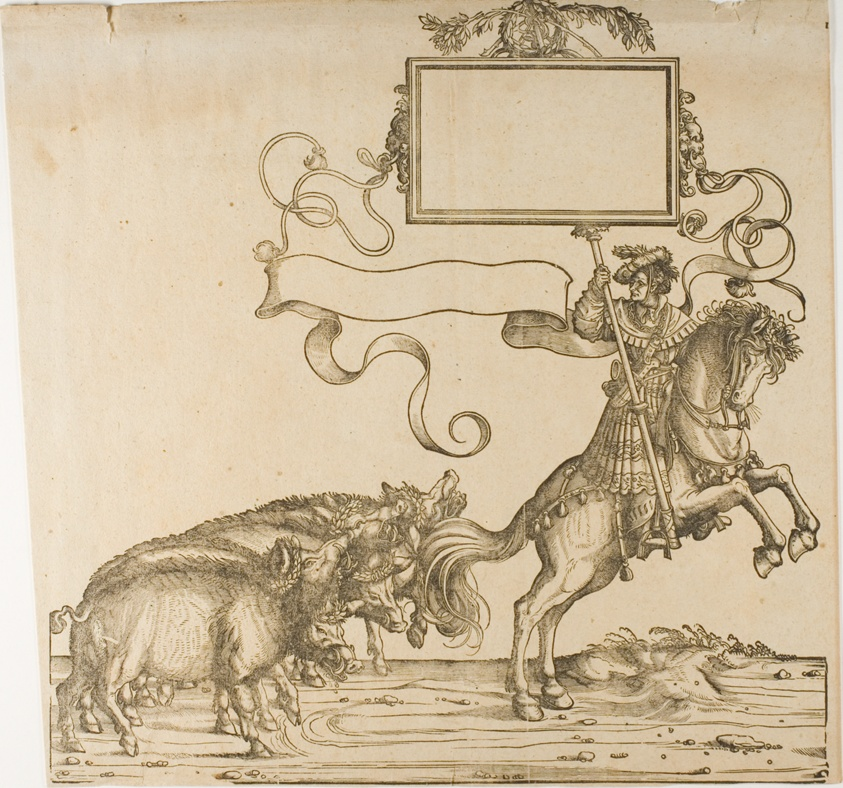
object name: Print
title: Triumph of Maximilian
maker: Hans Burgkmair, the elder (German, 1473-1531)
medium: Woodcut on paper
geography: Germany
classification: print; prints and drawing